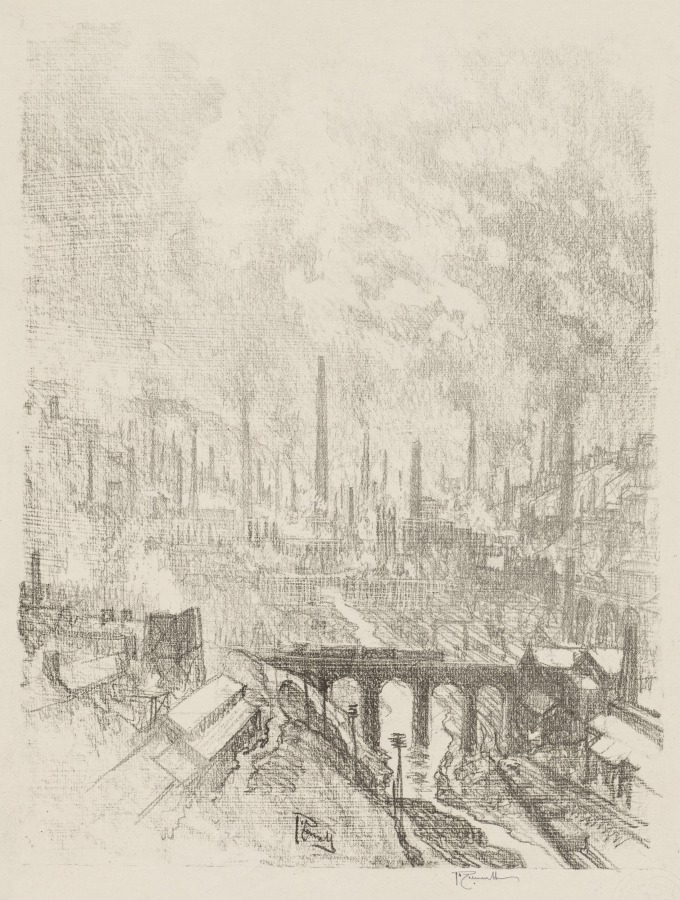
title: English War Work: Munitions City, No. 1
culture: America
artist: Joseph Pennell (American, 1857–1926)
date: 1916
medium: lithograph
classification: Print